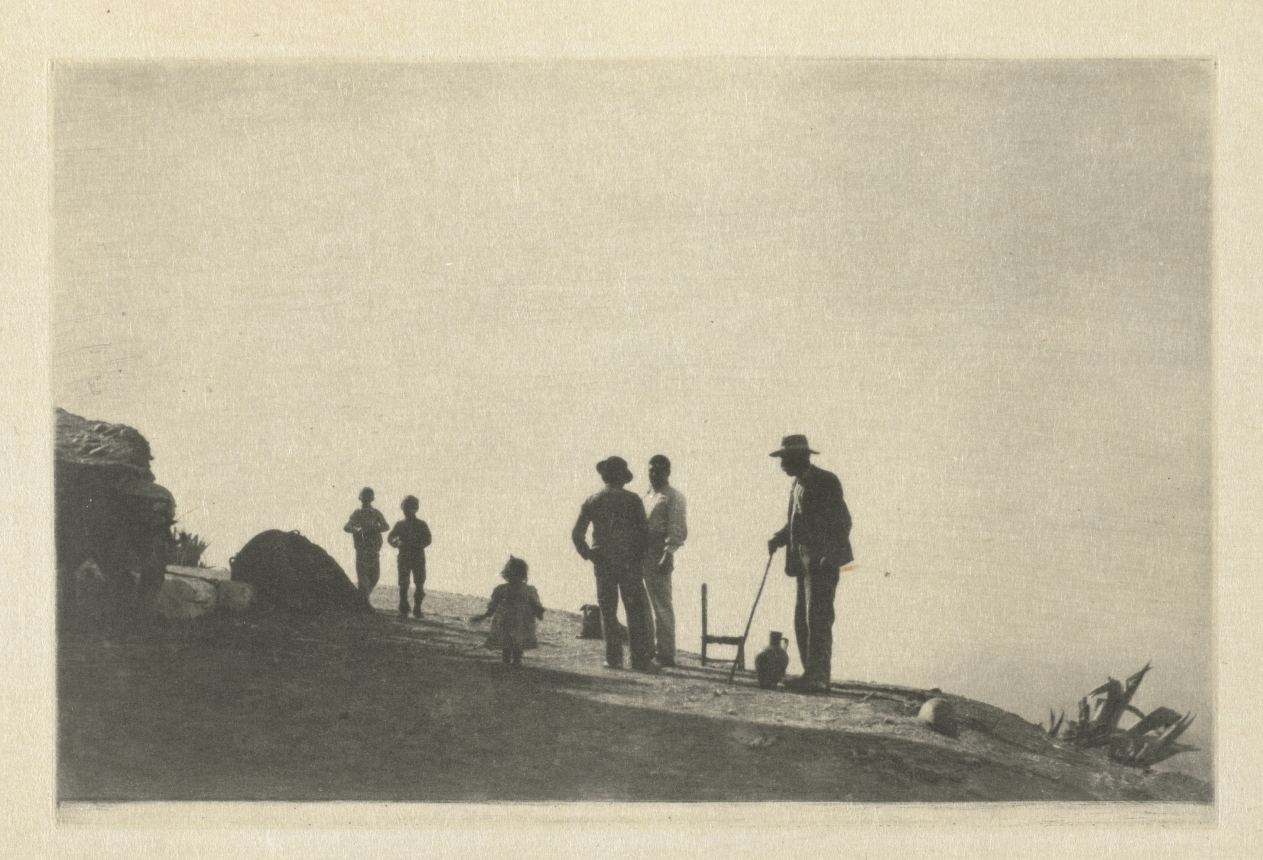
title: Camera Work: Group on a Hill Road - Granada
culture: England, 20th century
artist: J. Craig Annan (British, 1864–1946)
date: 1914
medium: photogravure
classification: Bound Volume